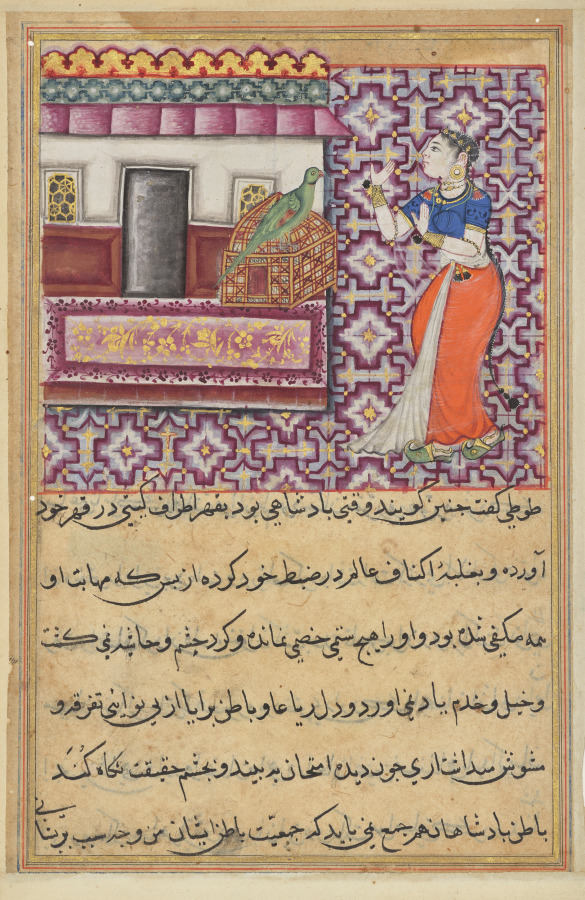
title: The parrot addresses Khujasta at the beginning of the fiftieth night, from a Tuti-nama (Tales of a Parrot): Fiftieth Night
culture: Mughal India, court of Akbar (reigned 1556–1605)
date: c. 1560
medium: gum tempera, ink, and gold on paper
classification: Painting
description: As the sun sets on the fiftieth night, Khujasta attempts to leave to visit her lover. She is stopped by Tuti, the clever talking parrot, who begins to tell a story about the princess of Rum and the anguish caused by her son. The parrot’s tale lasts until sunrise, and Khujasta is again unable to meet with her lover.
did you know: Rum is the Arabic name for Rome.